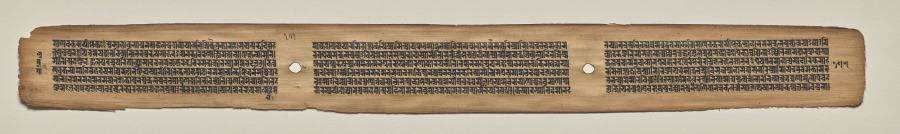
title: Text, folio 177 (verso), from a Manuscript of the Perfection of Wisdom in Eight Thousand Lines (Ashtasahasrika Prajnaparamita-sutra)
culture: Eastern India, Bihar, Vikramashila Monastery. Painting: Nepal, Kathmandu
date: Sunday, September 14, 1119 (year 239 of the Newar Samvat in the month of Ashvina)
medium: gum tempera and ink on palm leaves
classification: Painting